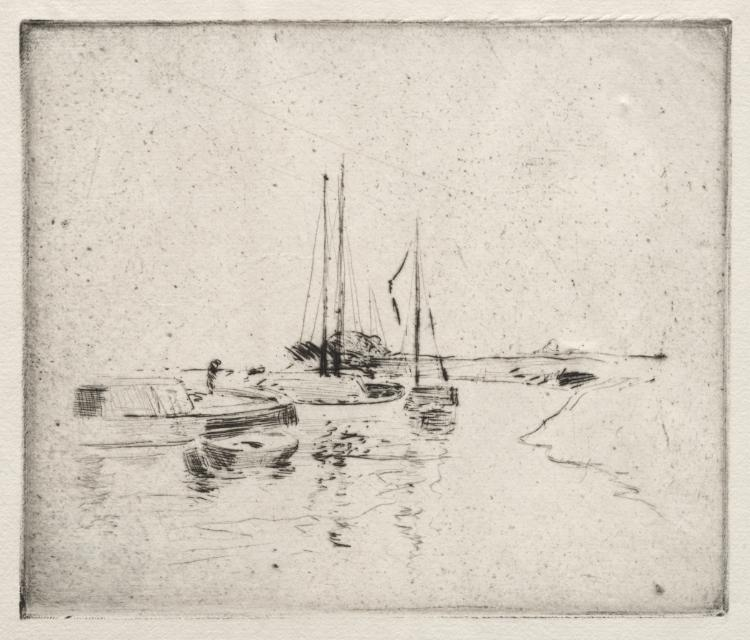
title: Four Boats on the Canal, Near Dordrecht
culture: America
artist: John Henry Twachtman (American, 1853–1902)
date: 1881–83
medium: etching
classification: Print